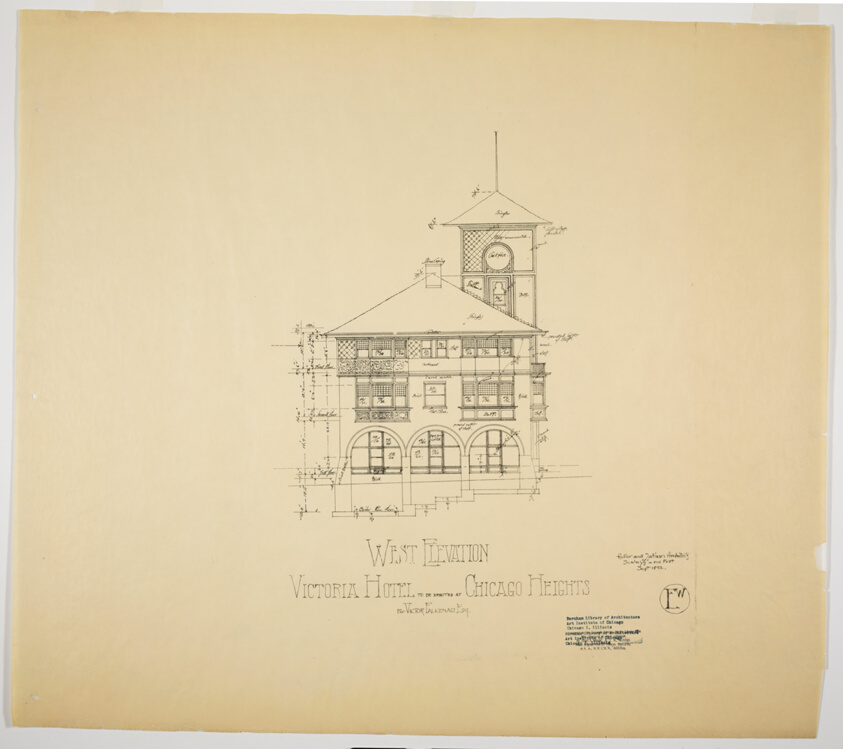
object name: Architectural Drawing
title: Victoria Hotel, Chicago Heights, Illinois, West Elevation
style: 19th century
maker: Adler and Sullivan; American, 1883-1895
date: 1892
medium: Blackline and color Hectograph prints on paper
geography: Chicago Heights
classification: architectural drawing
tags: hotels, architecture, elevation, illinois